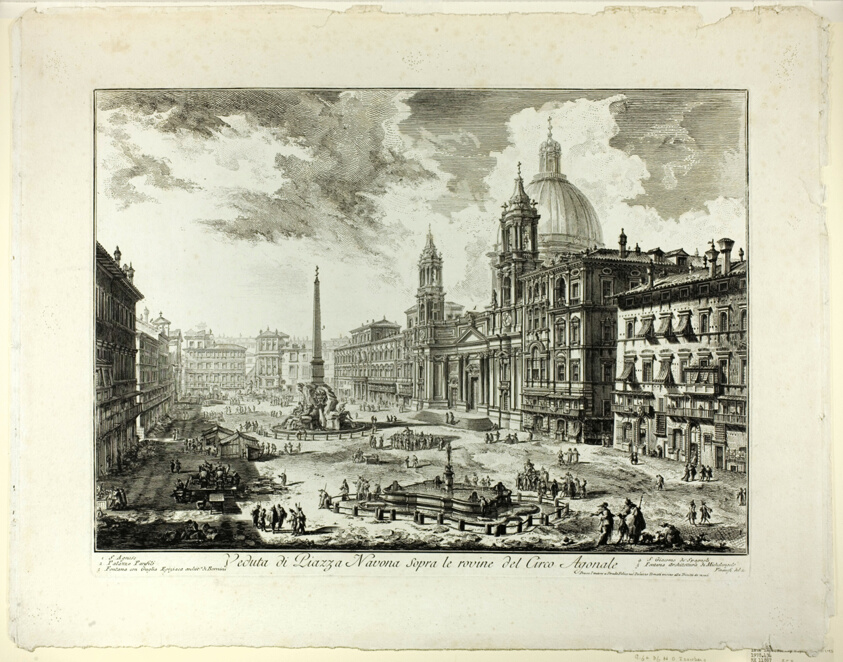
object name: Print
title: View of Piazza Navona above the ruins of the Circus of Domitian, from Views of Rome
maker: Giovanni Battista Piranesi (Italian, 1720-1778); published by Francesco (Italian, 1758-1810) and Pietro Piranesi (Italian, born 1758/9)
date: 1750/59, published 1800–07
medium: Etching on heavy white laid paper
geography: Italy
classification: etching; print; prints and drawing